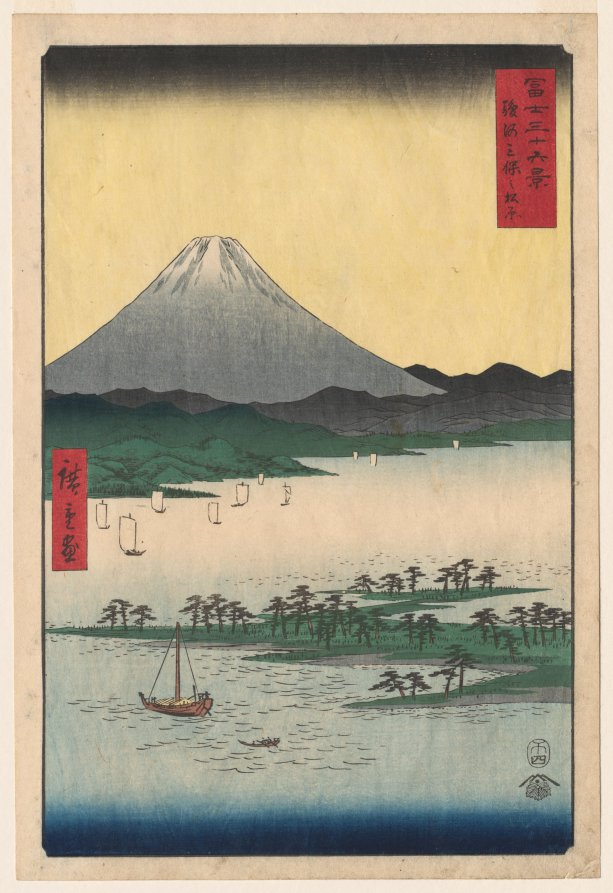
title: Pine Groves of Miho in Suruga, from the series Thirty-six Views of Mount Fuji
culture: Japan, Edo period (1615–1868)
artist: Utagawa Hiroshige (Japanese, 1797–1858)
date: 1858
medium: Color woodblock print, ink and color on paper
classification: Print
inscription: Signature: Hiroshige ga Publisher: Tsutaya Kichizo (emblem)